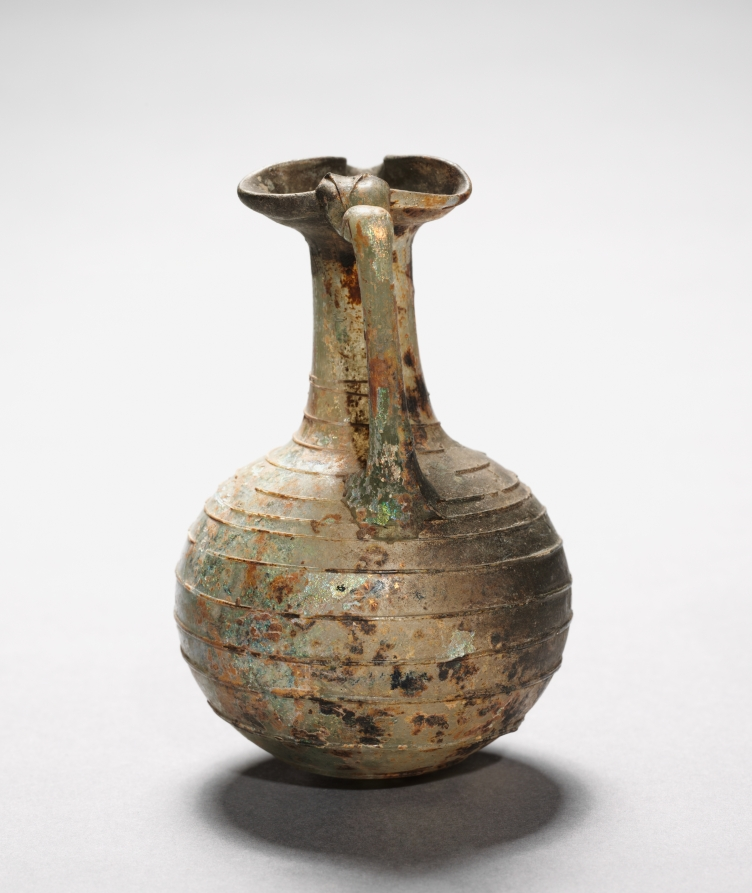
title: Pitcher with Handle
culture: Roman, Eastern Mediterranean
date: 100–400 CE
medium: glass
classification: Glass